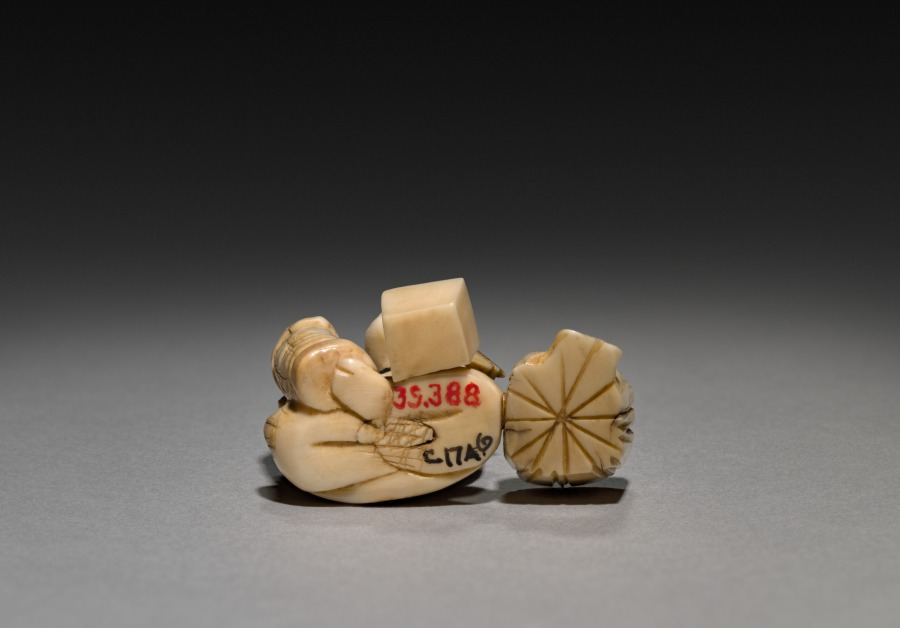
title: Man with Brush and Lantern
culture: Japan, Meiji period (1868–1912)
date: early 1900s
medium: ivory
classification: Ivory